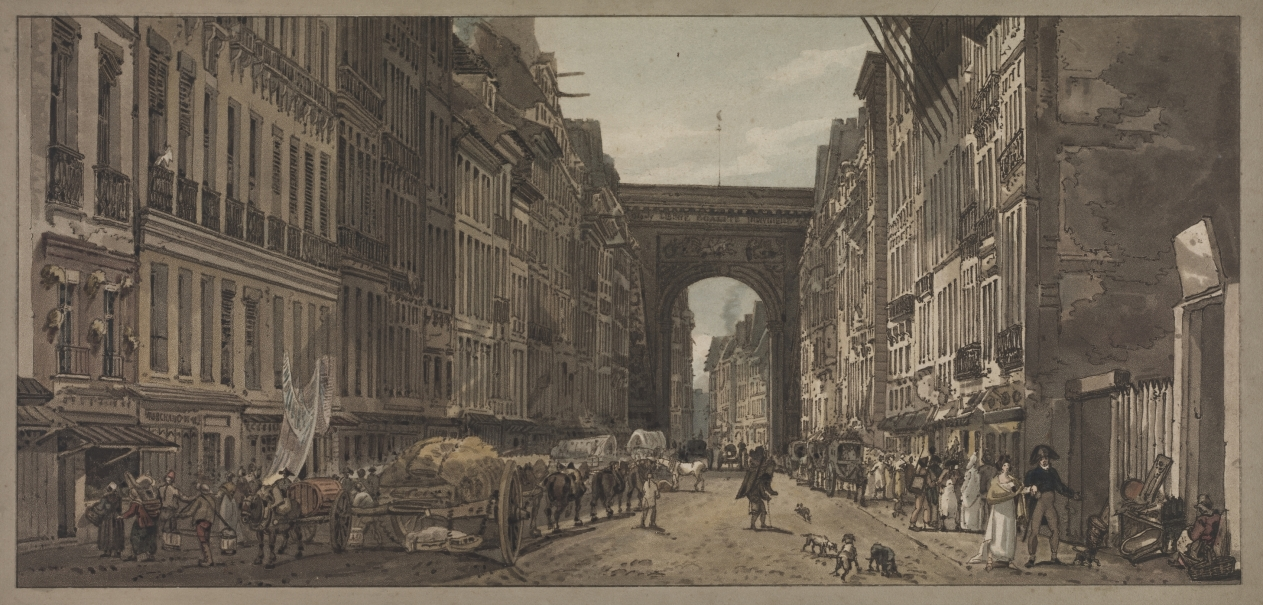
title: A Selection of Twenty of the Most Picturesque Views in Paris: View of the Gate of St. Denis taken from the Suburbs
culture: England, 19th century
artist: Thomas Girtin (British, 1775–1802)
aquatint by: Frederick Christian Lewis (British, 1779–1856)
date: 1803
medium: softground etching and aquatint, hand-colored with watercolor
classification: Print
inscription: Lower margin, in pencil: Early Proof